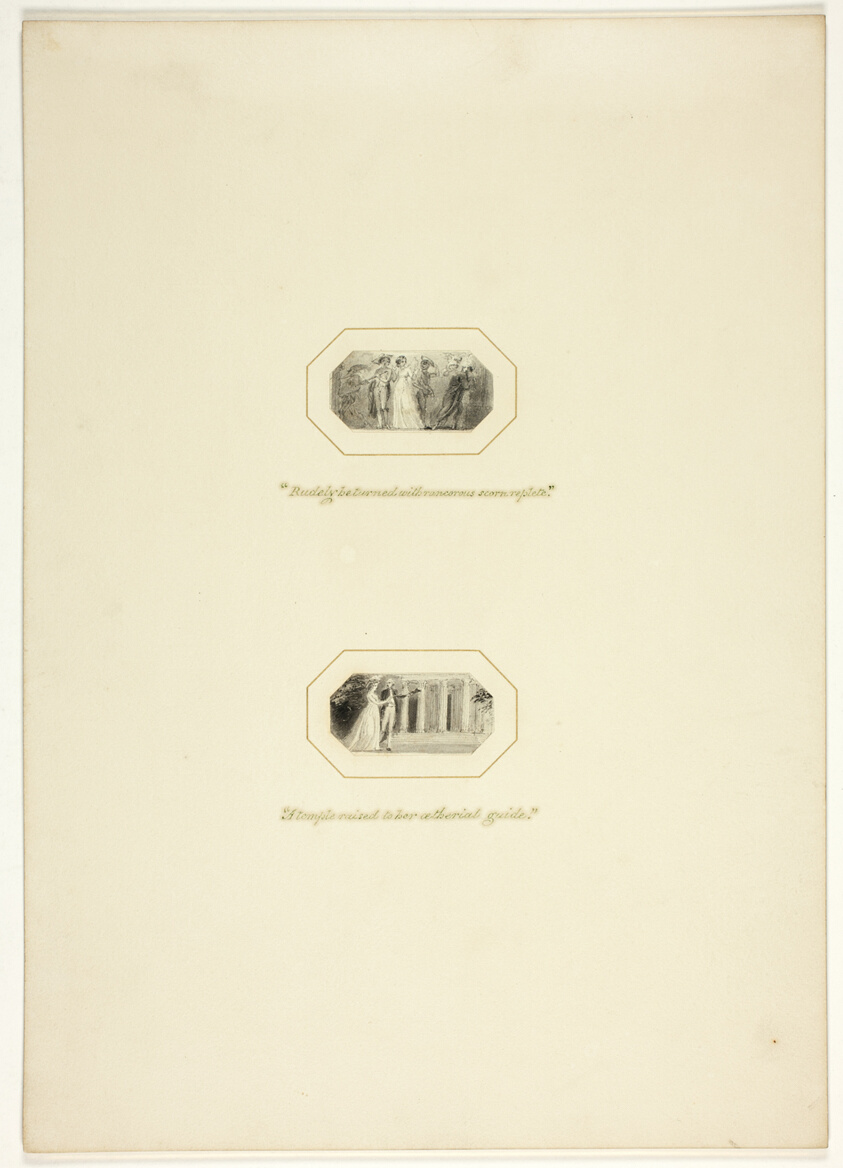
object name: Drawing and Watercolor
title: Study for a plate from The Triumphs of Temper, in the 1796 Royal Engagements Pocket Book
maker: Thomas Stothard (English, 1755-1834)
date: c. 1795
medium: Ink wash on paper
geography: England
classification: ink or chalk wash; drawings (visual works); prints and drawing